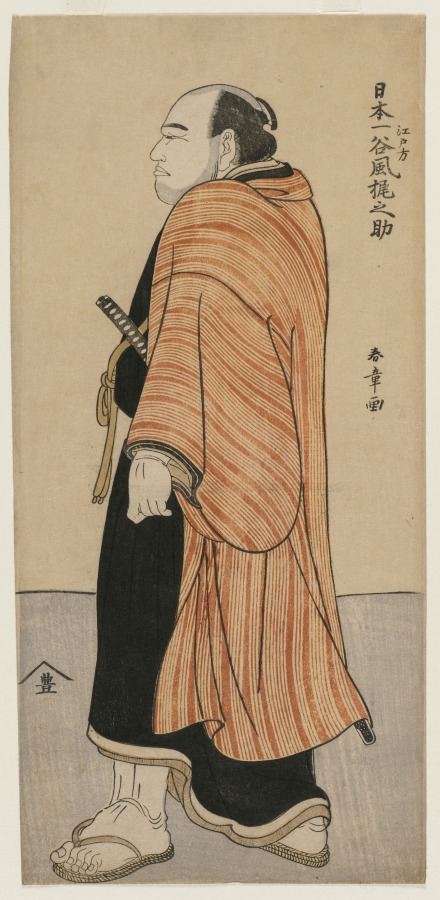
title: Tanikaze Kajinosuke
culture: Japan, Edo period (1615–1868)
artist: Katsukawa Shunshō (Japanese, 1726–1792)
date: c. mid-1780s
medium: color woodblock print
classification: Print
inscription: Artist's signature: Shunsho ga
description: Tanikaze Kajinosuke (1750–1795) was an extraordinary champion sumo wrestler who hailed from what is now Sendai, a city in northern Japan. Even at his death from influenza at age 44, he was dominating the ring and was one of the first to be given sumo’s highest rank, yokozuna (横綱), during his lifetime. In this print, Katsukawa Shunshō showed him as he may have appeared strolling the avenue, spied by his fans.